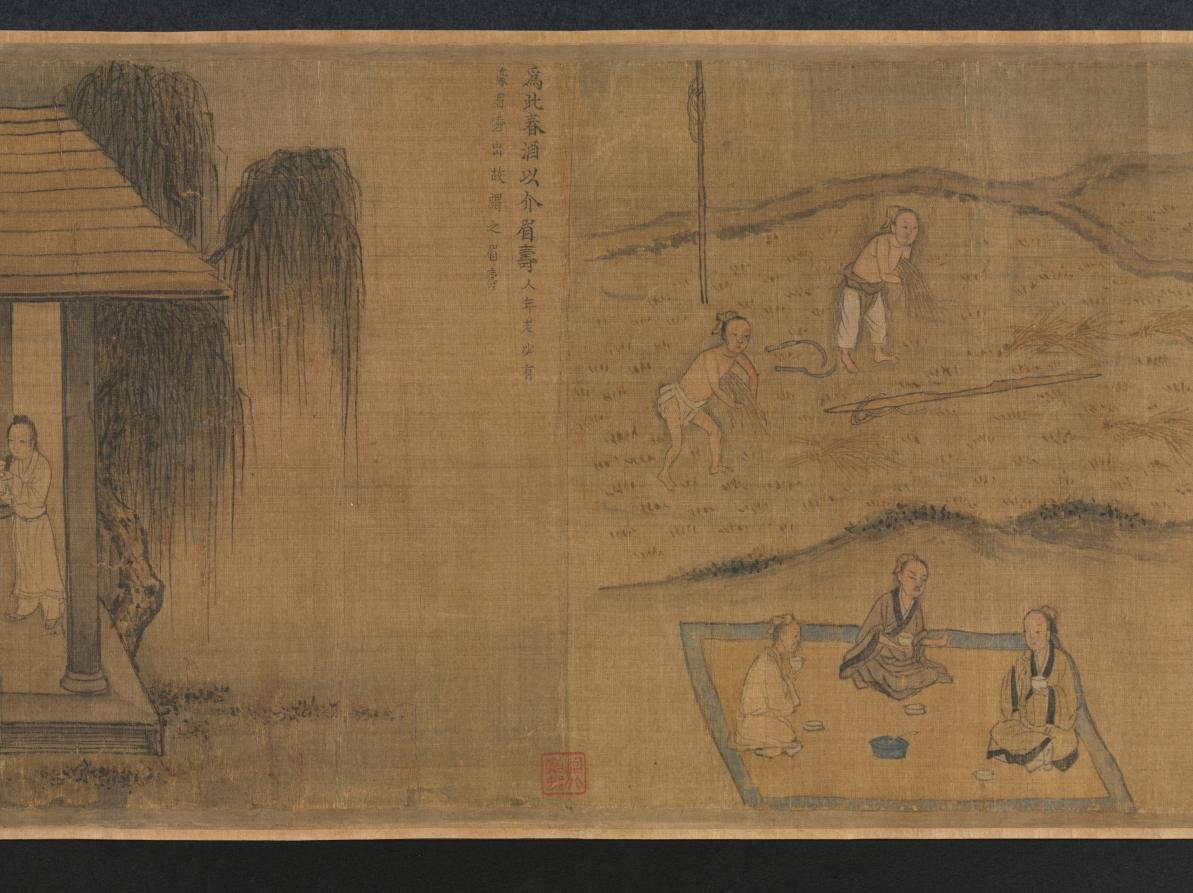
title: "Seventh Month" from the Odes of Bin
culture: China, Southern Song dynasty (1127-1279)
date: 1200s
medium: Handscroll; ink and color on silk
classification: Painting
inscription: Colophons: 1. [on the frontispiece] by the Qianlong emperor (dated 1741). 2. by Lu Wan (dated Zhengde dingchou, 1517). 2. by the Jiaqing emperor (dated 1807).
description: According to Confucian thought, the ruler looks after the well-being of his people which involves agricultural activities. Seventh Month from the ancient Odes of Bin in the Shijing (Book of Poetry) describes occupations throughout the year, including plowing, harvesting, hunting, making clothes, and observing rituals. The earliest illustrations of these Odes accompanied by text were commissioned by Southern Song emperor Gaozong (reigned 1127–1162). As the lower Yangzi delta had become the new seat of government, Gaozong had sets of these illustrations produced by court artists to revive the dynasty and convince the Confucian officialelite of his legitimacy to rule.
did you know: The Odes of Bin appears in the classic Shijing (Book of Poetry), an anthology of more than 300 poems, folk songs, and ceremonial hymns that were originally chanted to music.